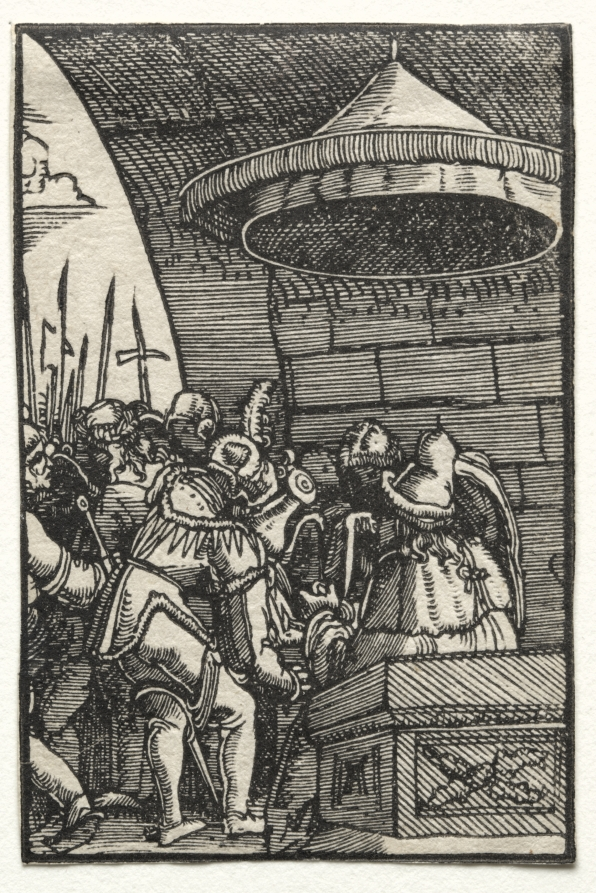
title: The Fall and Redemption of Man: Pilate Washing His Hands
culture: Germany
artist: Albrecht Altdorfer (German, c. 1480–1538)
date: c. 1515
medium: woodcut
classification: Print